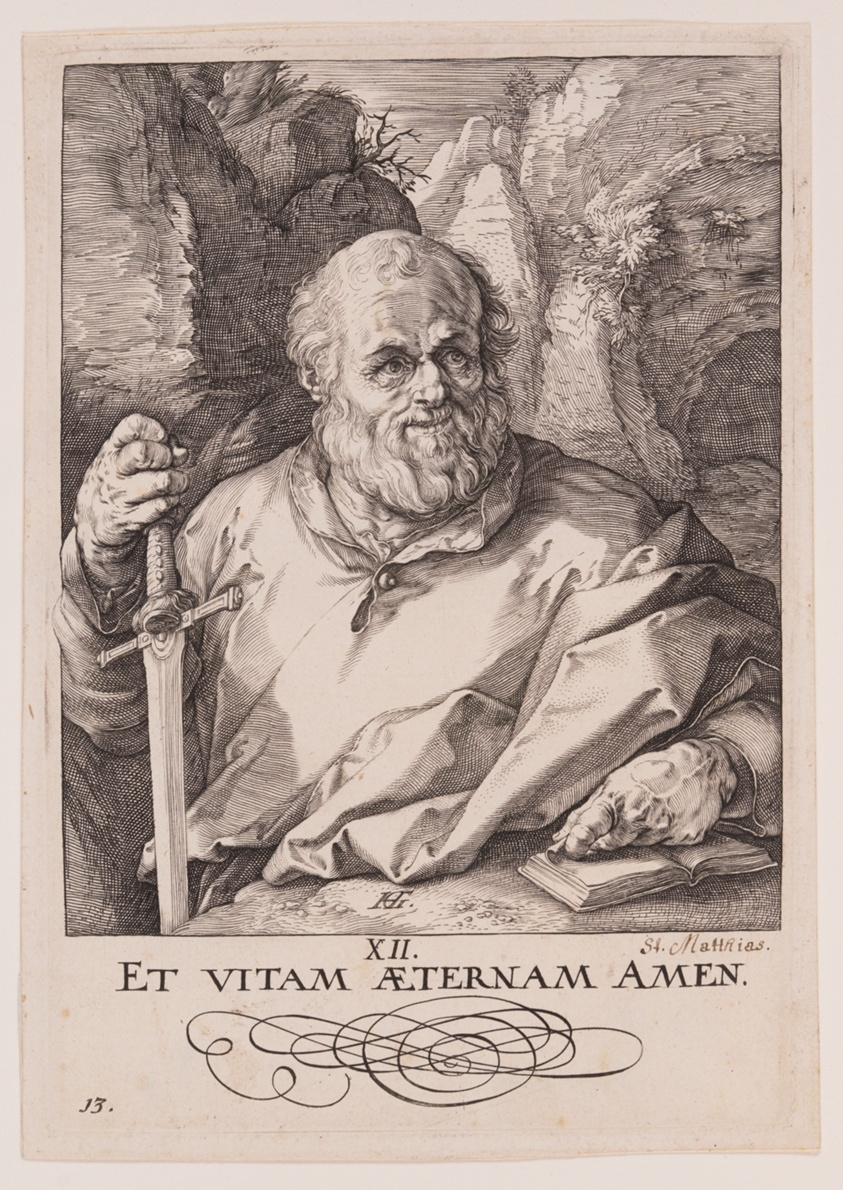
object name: Print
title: St Matthias, from Christ, the Apostles and St Paul with the Creed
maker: Hendrick Goltzius (Dutch, 1558–1617)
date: 1589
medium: Engraving on ivory laid paper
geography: Netherlands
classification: engraving; paper; print; prints and drawing